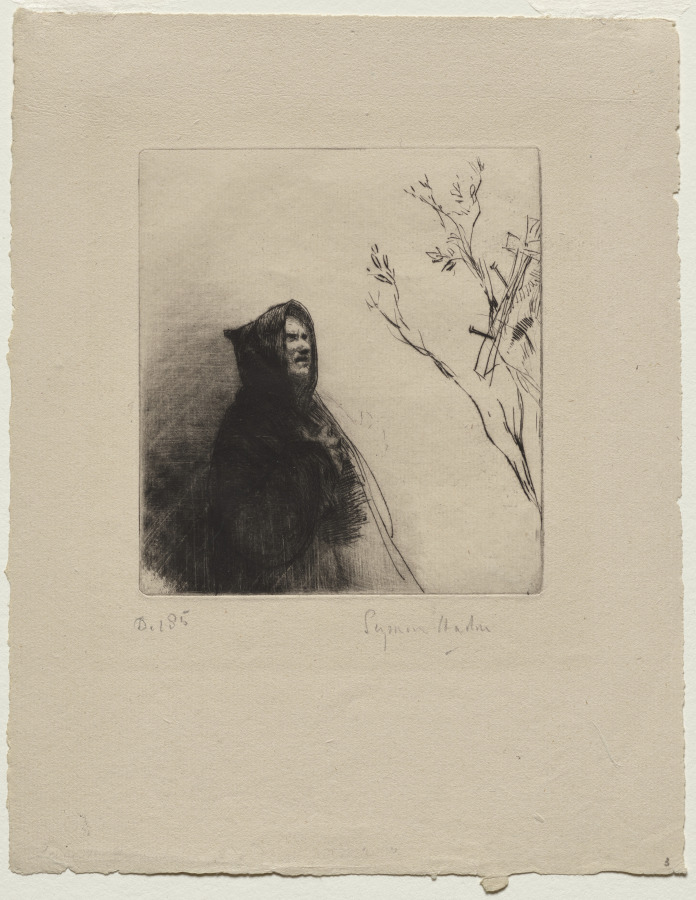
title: The Monk Praying - St. Francis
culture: England, 19th century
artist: Francis Seymour Haden (British, 1818–1910)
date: 1877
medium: drypoint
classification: Print